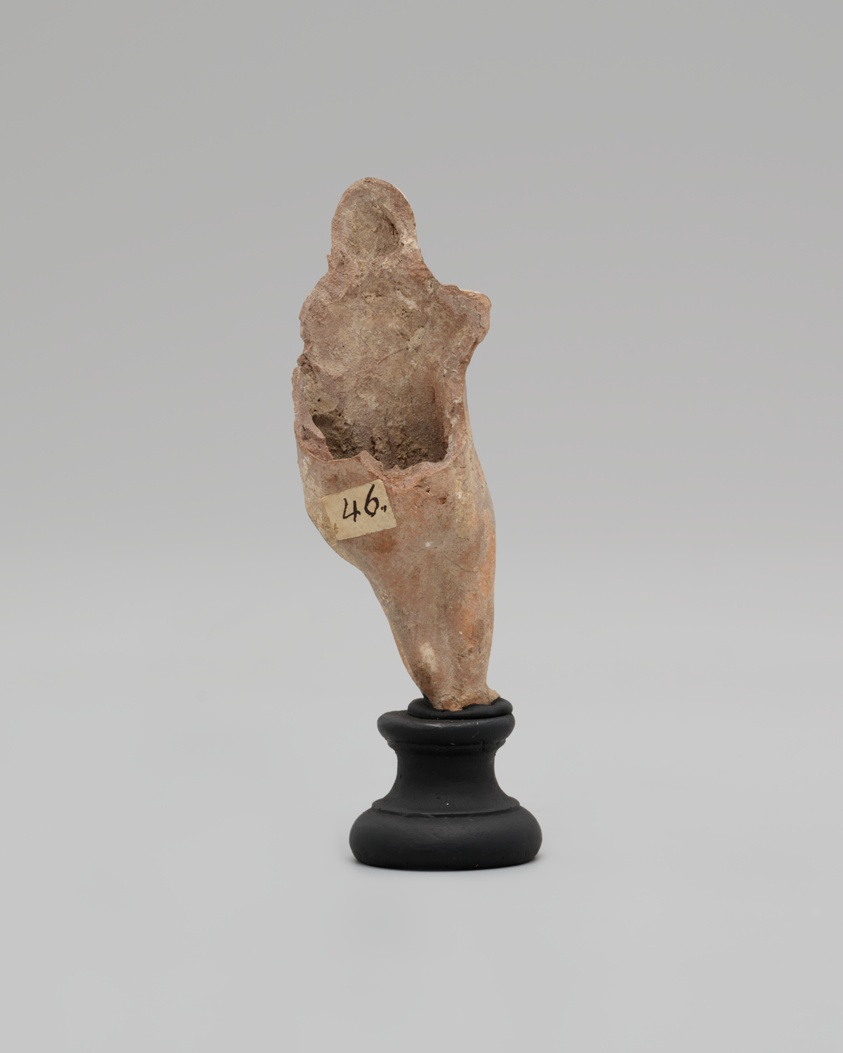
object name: Sculpture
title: Figurine of a Female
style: greek, ancient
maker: Greek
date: 3rd-2nd century BCE (?)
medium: terracotta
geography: Greece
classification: earthenware; ceramics; sculpture; ancient art